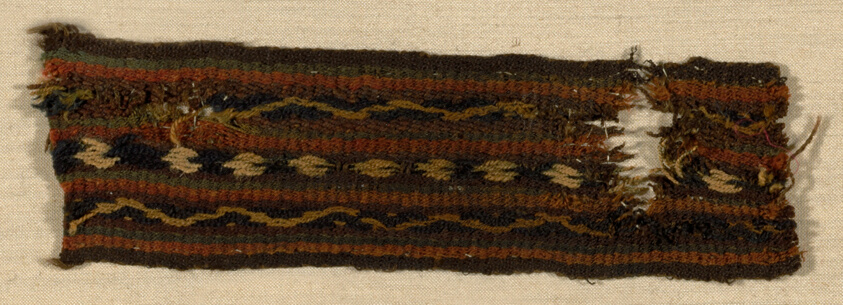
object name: Textile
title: Fragment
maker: Peru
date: 1–1532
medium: Plain compound cloth (old card)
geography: Peru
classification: textile; weaving